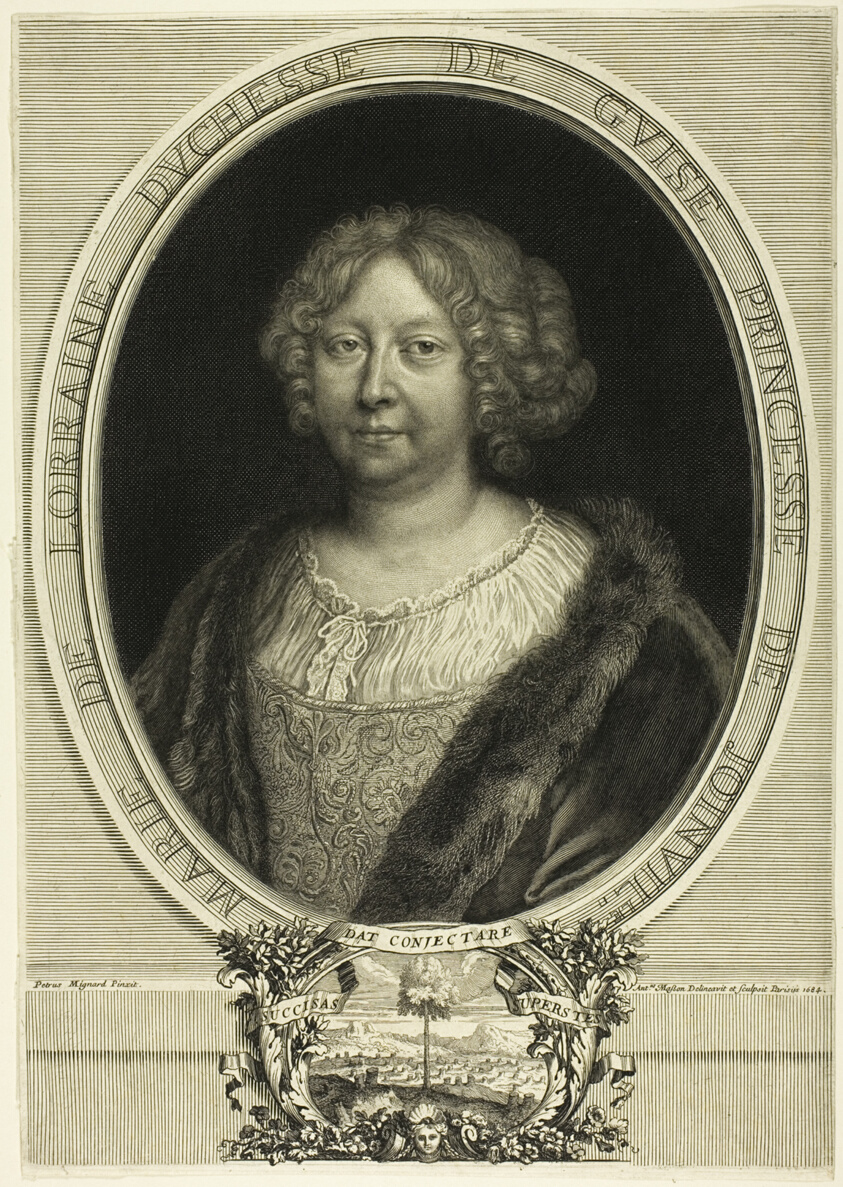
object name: Print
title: Marie de Lorraine, Duchesse de Guise, Princesse de Joinville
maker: Antoine Masson (French, 1636-1700); after Pierre Mignard I (French, 1612-1695)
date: 1684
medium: Engraving on paper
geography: France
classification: engraving; print; prints and drawing